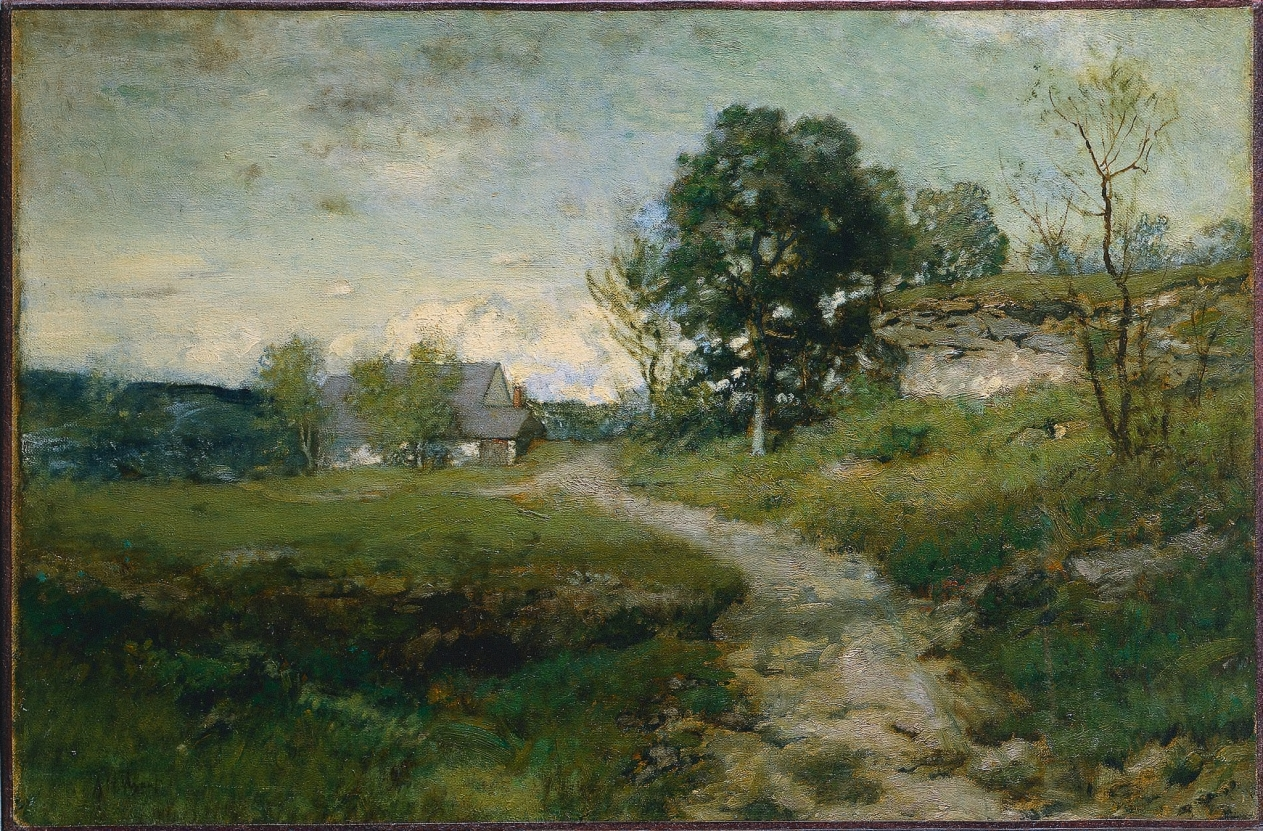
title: Arkville Landscape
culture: America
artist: Alexander H. Wyant (American, 1836–1892)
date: 1880s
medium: oil on canvas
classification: Painting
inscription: Signed lower left: "A.H. Wyant"